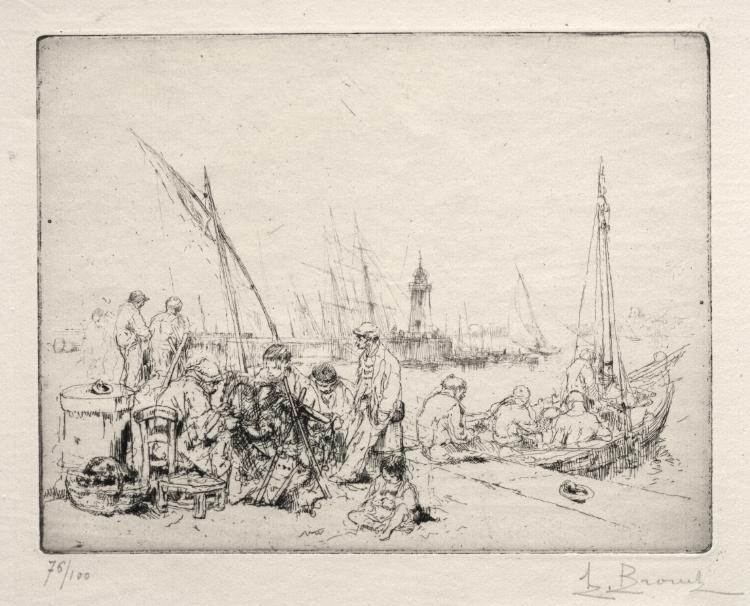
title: The Net Menders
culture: France, 20th century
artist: Auguste Brouet (French, 1872–1941)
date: c. 1918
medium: etching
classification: Print